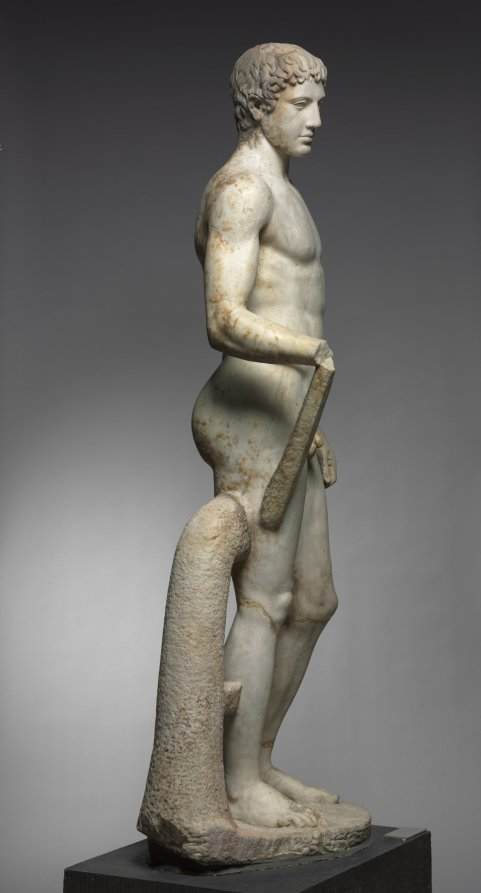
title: Statue of an Athlete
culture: Italy, Roman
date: 1–100 CE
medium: marble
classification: Sculpture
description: This idealized athlete recalls Greek sculptural types invented and popularized during the 400s BC. Large-scale athletes and other sculptures like this were originally created by famous artists as sanctuary dedications. Centuries later, they were widely copied and adapted by Roman sculptors, whose clients sought their own versions of earlier masterpieces. Working in marble rather than bronze, these sculptors added certain elements for stability, such as the struts and the large tree trunk beside the right leg here. Sculptures like this one are profoundly complex, made by and for Romans but descended from Greek ancestors.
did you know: For many years, this sculpture stood in the rotunda of the Cleveland Museum of Art.